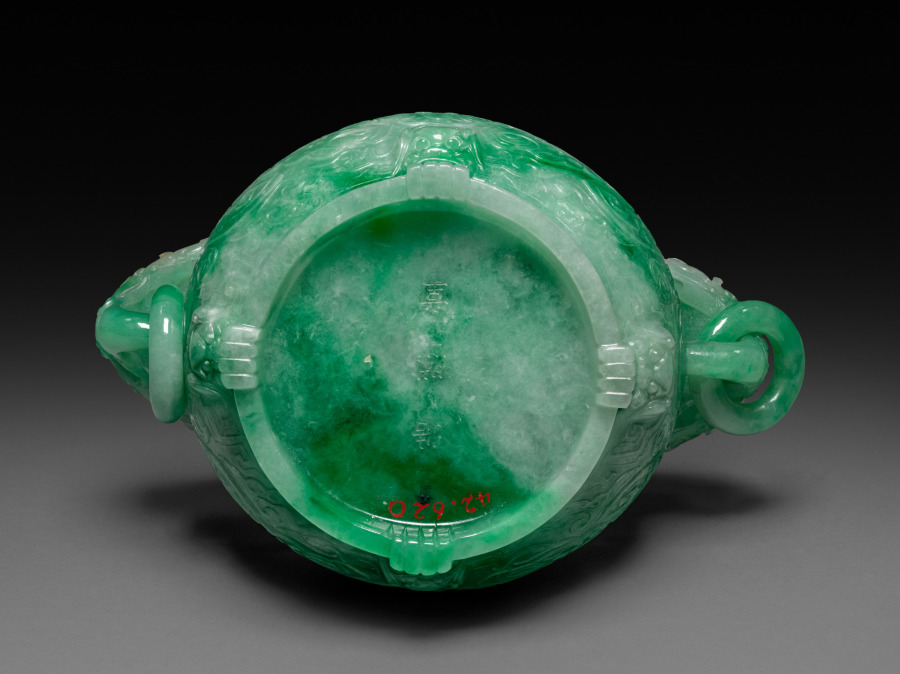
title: Incense Burner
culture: China, Qing dynasty (1644–1911), Qianlong reign (1736–95)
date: 1736–95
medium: jade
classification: Jade